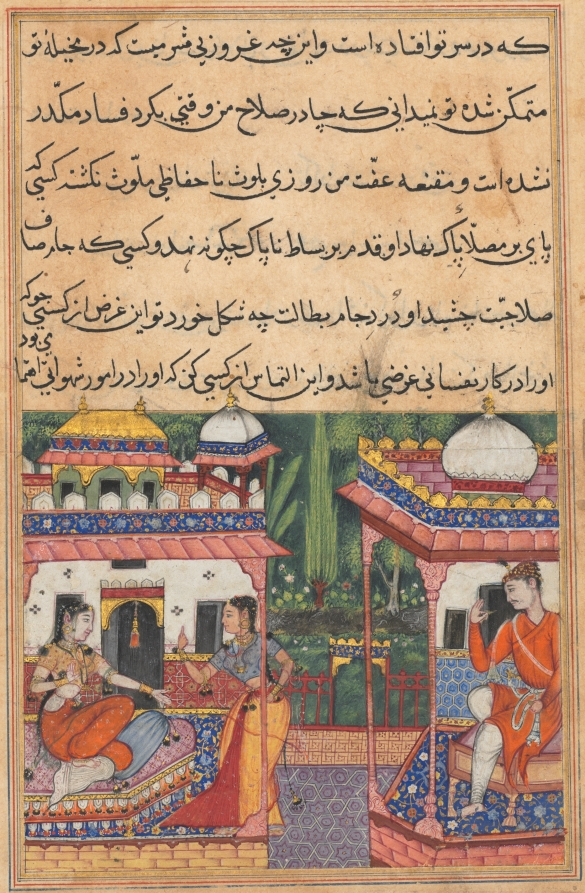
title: Kaiwan sends a message of love to Khurshid, wife of his brother Utarid who is away on a journey, from a Tuti-nama (Tales of a Parrot): Thirty-second Night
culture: Mughal India, court of Akbar (reigned 1556–1605)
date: c. 1560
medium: gum tempera, ink, and gold on paper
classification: Painting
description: Khurshid, seated on the bed at the left, is addressed by the messenger, who relays Kaiwan’s confession. Khurshid, who is virtuous and devout, sternly rejects his amorous advances. On the right, Kaiwan himself sits, anxiously awaiting the messenger’s return. Upon learning of Khurshid’s refusal, Kaiwan devises a plan to prevent his brother Utarid from learning of his indiscretions.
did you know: Kaiwan is the name of the planet Saturn, considered to be a harbinger of misfortune.